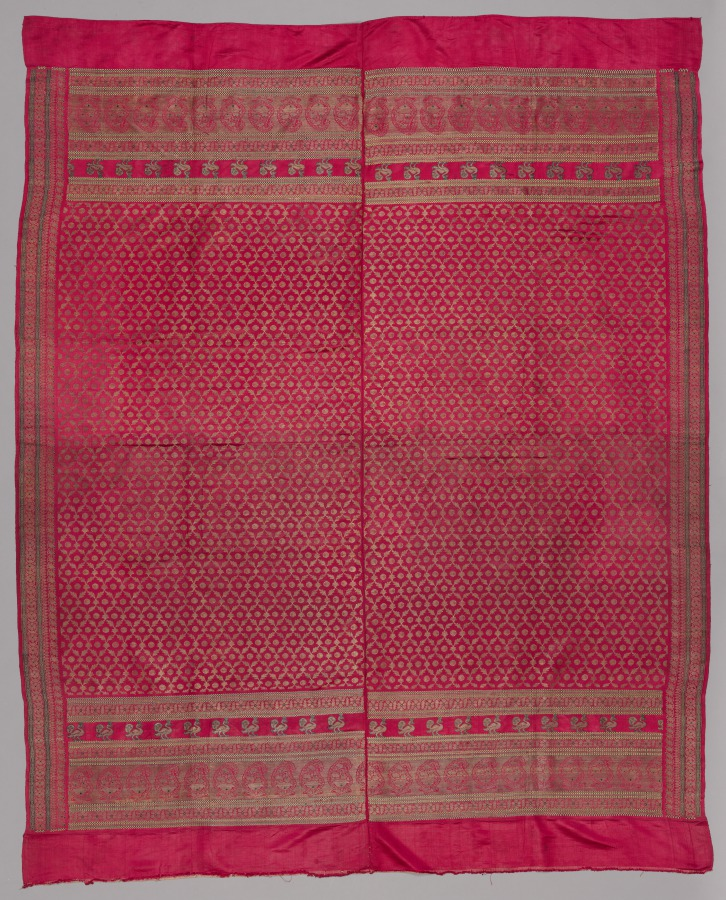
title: Gold Brocade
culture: India, 19th century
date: 1800s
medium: brocade; silk and metal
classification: Textile